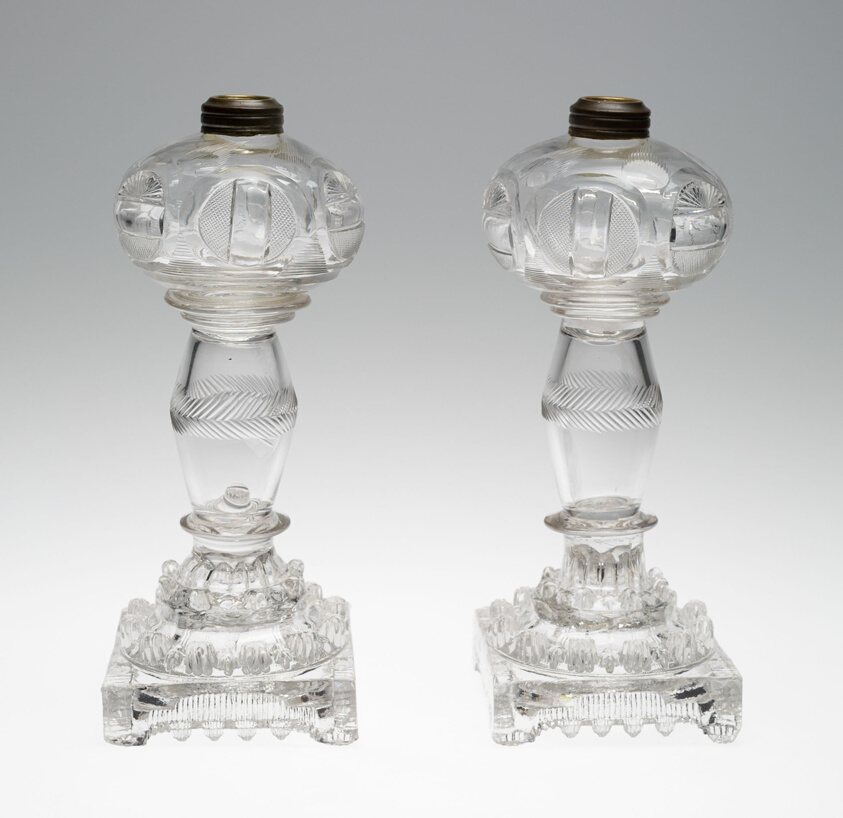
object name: Glass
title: Pair of Lamps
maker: Attributed to Union Flint Glass Works; American, founded 1826; Kensington, Pennsylvania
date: 1835–40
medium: Glass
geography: Philadelphia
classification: furniture accessory; american decorative arts; american arts; decorative arts